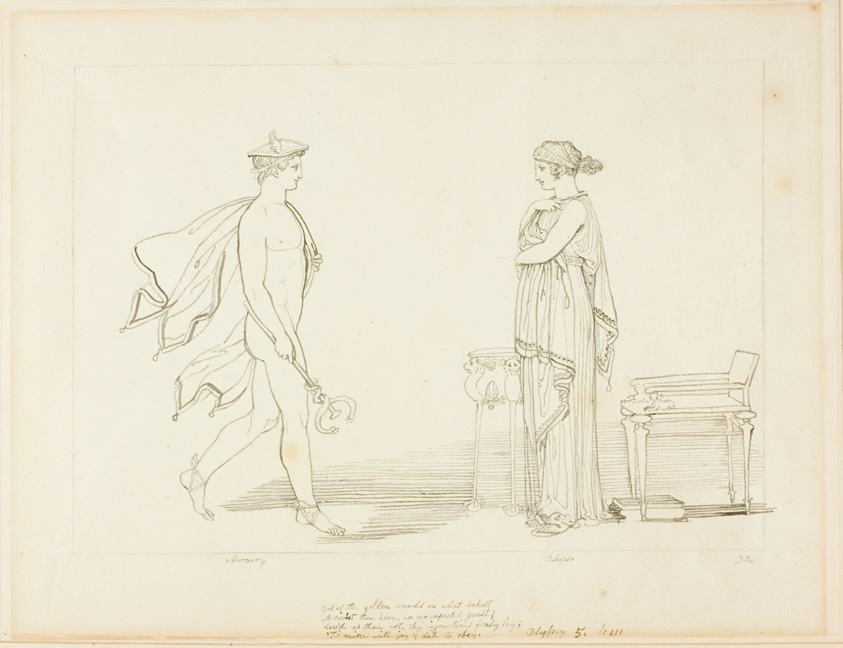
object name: Drawing and Watercolor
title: Mercury and Calypso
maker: John Flaxman, II; English, 1755-1826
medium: Pen and black ink, over graphite, on ivory wove paper, laid down on tan wove paper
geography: England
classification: pen and ink drawings; drawings (visual works); prints and drawing